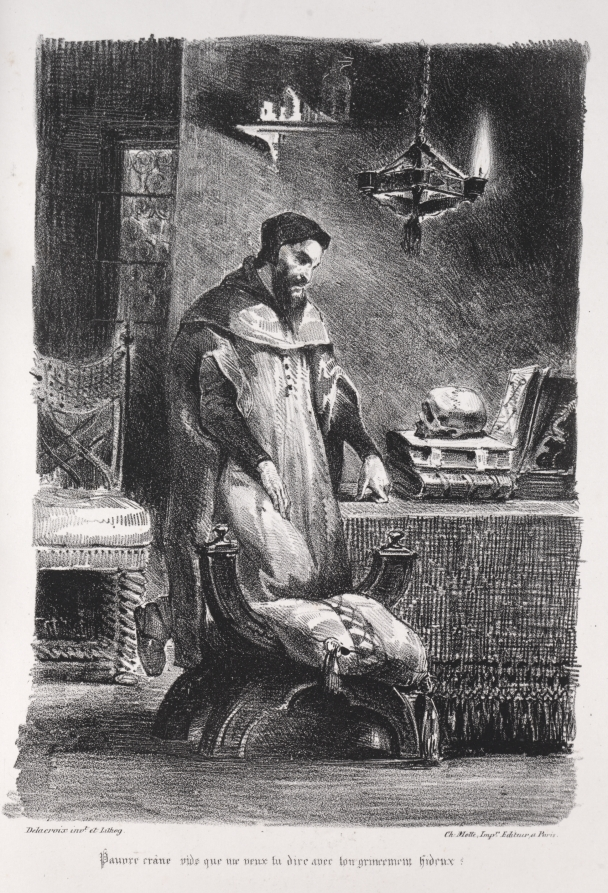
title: Illustrations for Faust: Faust in his dressing-room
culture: France, 19th century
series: Faust: Tragédie de M. de Goethe, translated into French by Albert Stapfer.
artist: Eugène Delacroix (French, 1798–1863)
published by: Chez Ch. Motte, Éditeur, distributed by Chez Sautelet, Libraire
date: 1828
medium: lithograph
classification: Print